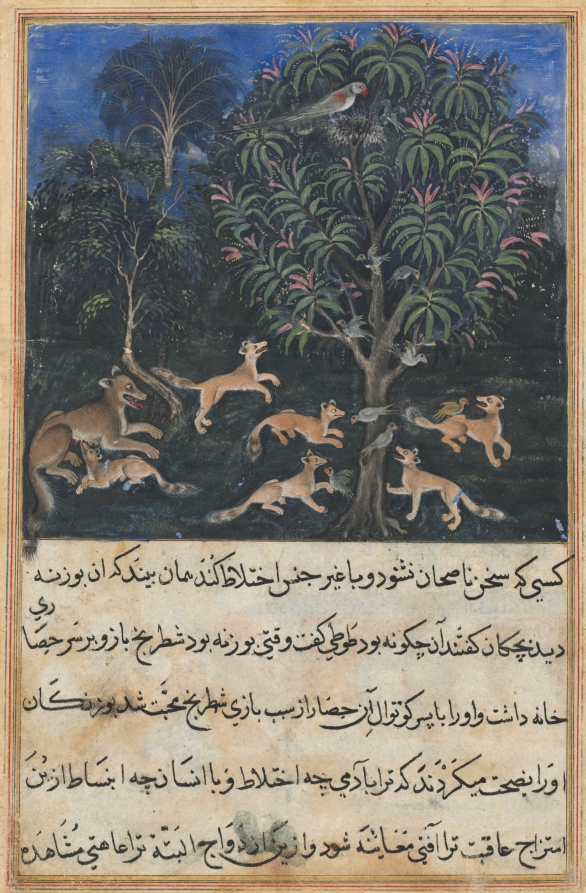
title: The parrot mother cautions her young on the danger of playing with foxes, from a Tuti-nama (Tales of a Parrot): Fifth Night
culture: Mughal India, court of Akbar (reigned 1556–1605)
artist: Dasavanta (Indian, d. 1584)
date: c. 1560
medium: gum tempera, ink, and gold on paper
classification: Painting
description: One night the parrot Tuti tells Khujasta that he hopes her relationship with her new lover does not wind up being only half-baked, like the medical treatment of the king of Kamarupa. She asks what that was about, and Tuti begins the story by telling of a mother parrot who lived in the forest with her young, who liked to play with the fox cubs who lived at the base of the tree. The mother parrot is perched on the edge of her treetop nest.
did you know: A fox cub suckles contentedly, as the mother keeps a sharp eye on the others.